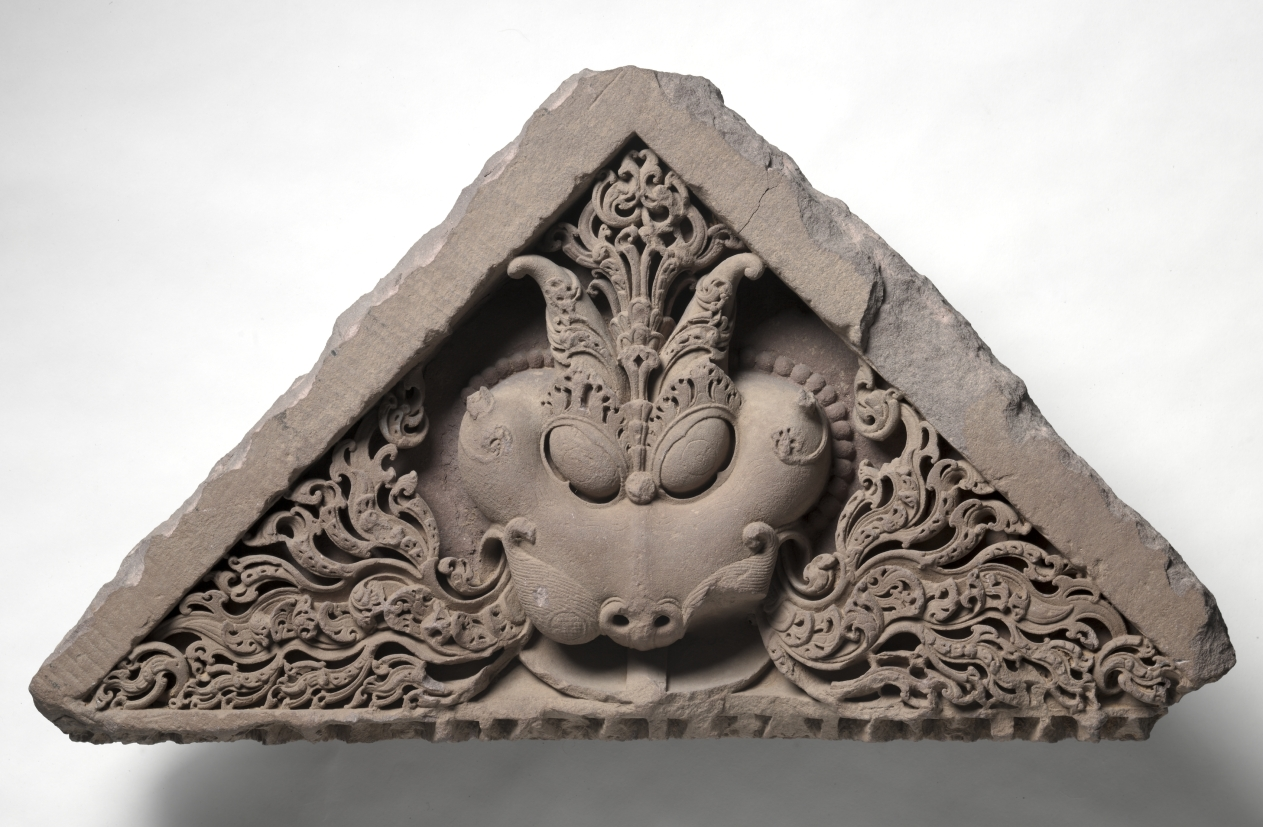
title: Pediment with the Face of Glory (Kirti-mukha)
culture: Northern India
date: c. 1000s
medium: sandstone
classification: Sculpture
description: Throughout India, sculptures of horned mythic beasts spewing stylized foliage were built into temples, above the entryways, in line with the sanctum. Known as the “face (mukha) of glory (kirti),” the protective mask emanates divine energy from the heart of the temple. The scrolling vegetation flowing from the mouth visually references the unending bounty and success that derives from worship and devotions.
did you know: Irises and pupils have been lightly incised into the bulging eyes.